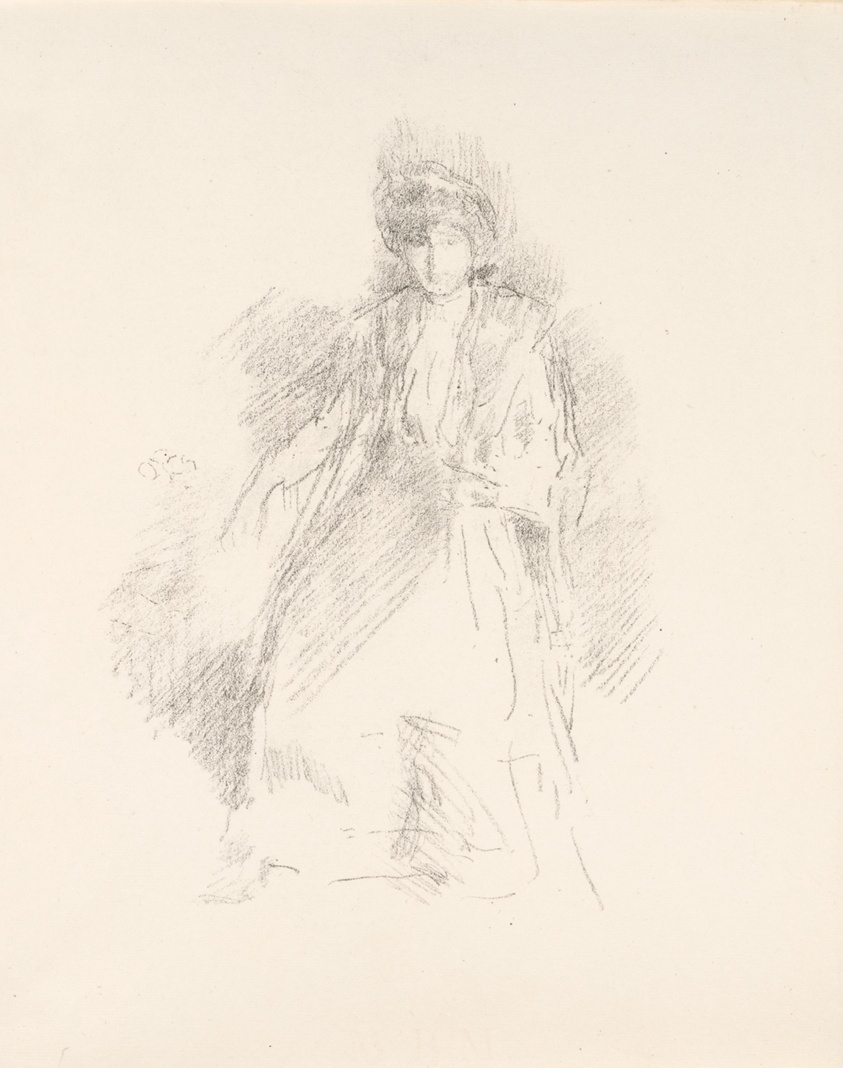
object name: Print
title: Portrait of a Young Woman Wearing a Hat [Miss Seaton]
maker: James McNeill Whistler (American, 1834-1903)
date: 1897 (only printed posthumously 1903)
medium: Transfer lithograph in black ink on ivory laid paper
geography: United States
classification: transfer lithograph; lithograph; print; prints and drawing; paper